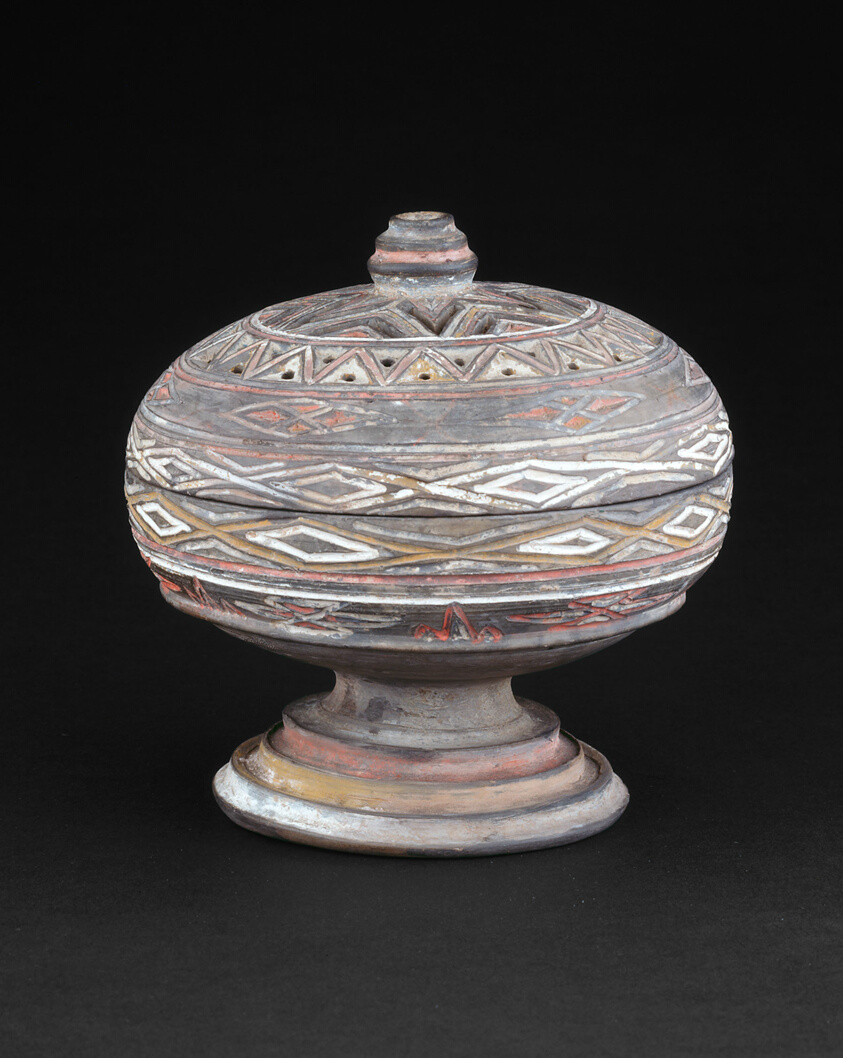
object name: Vessel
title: Incense Burner (Xianglu)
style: Chinese (culture or style)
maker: China; probably from Hunan province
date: Western Han dynasty, 206 BCE–9 CE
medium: Gray earthenware with polychrome painting and openwork decoration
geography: China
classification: earthenware; ceramics; sculpture; asian art; vessel